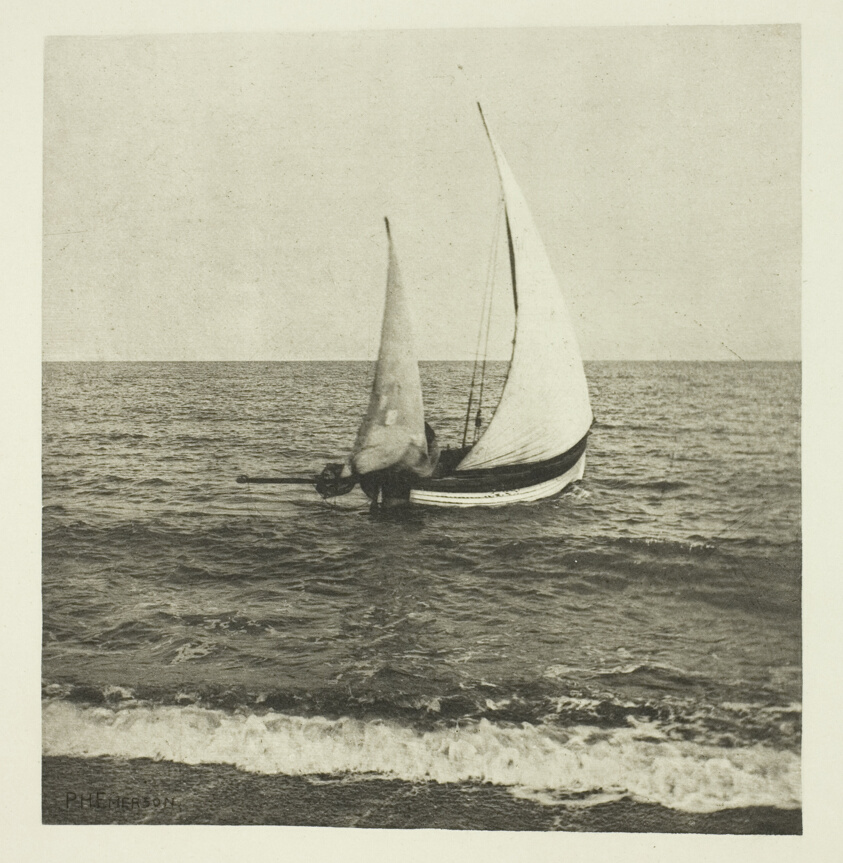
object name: Photograph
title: A Suffolk Shrimper "Going Off"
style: 19th century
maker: Peter Henry Emerson (English, born Cuba, 1856–1936)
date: c. 1883/87, printed 1888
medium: Photogravure, pl. XXV from the album "Pictures of East Anglian Life" (1888)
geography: England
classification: photogravure; photomechanical process; photography; photograph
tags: Collected by Hugh Edwards, Pictures of East Anglian Life, Seat of War in the Crimea